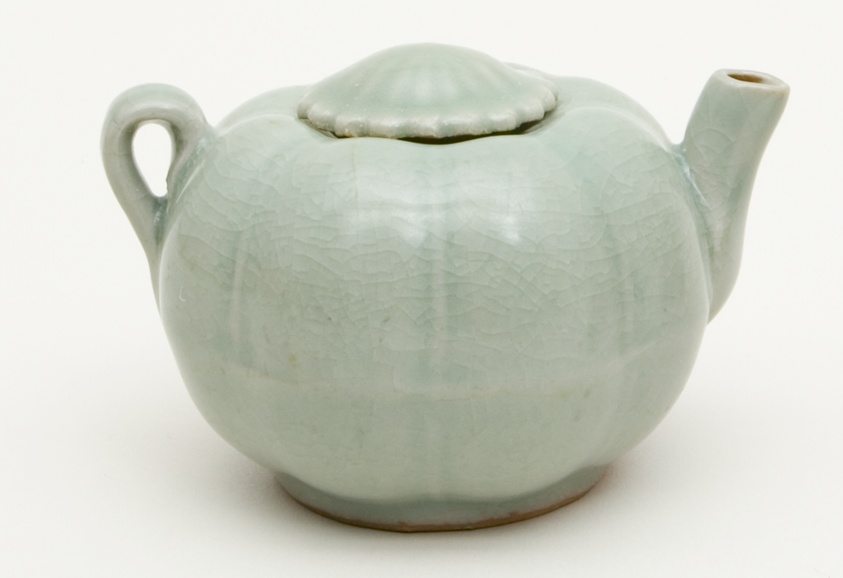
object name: Vessel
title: Melon-Shaped Ewer (Wine Pot) with Flower-Head/ Foliate Lid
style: Chinese (culture or style)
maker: China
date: Southern Song (1127–1279) or Yuan dynasty (1279–1368), c. 13th century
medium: Longquan ware; stoneware with underglaze molded decoration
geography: China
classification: ewer (vessel); vessel; ceramics